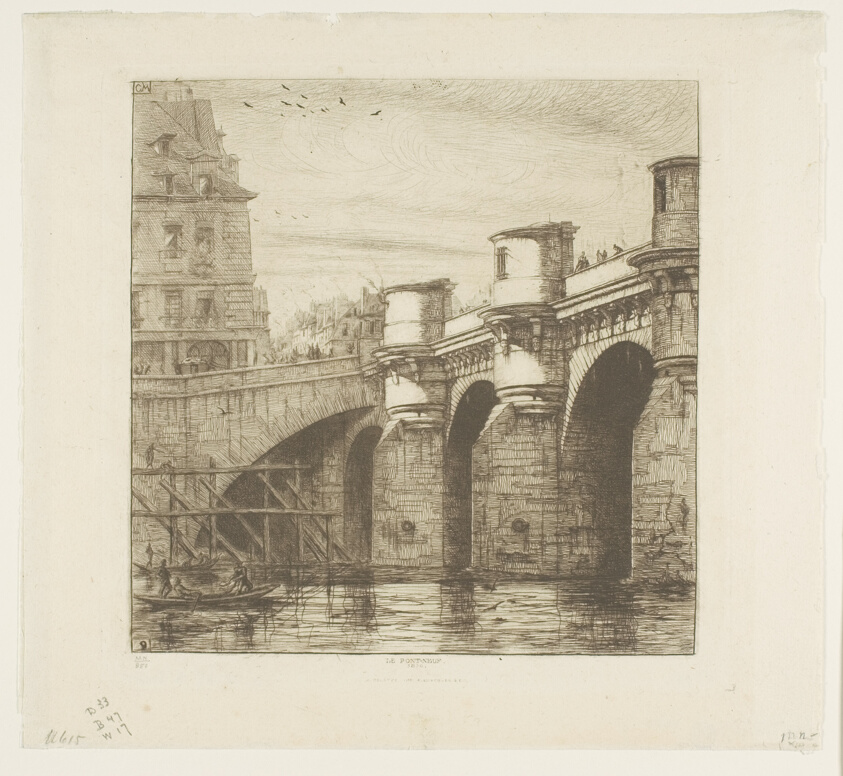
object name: Print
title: Pont-Neuf, Paris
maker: Charles Meryon (French, 1821-1868); printed by Auguste Delâtre (French, 1822-1907)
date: 1853, printed 1861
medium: Etching and drypoint on ivory laid paper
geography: France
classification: etching; print; prints and drawing